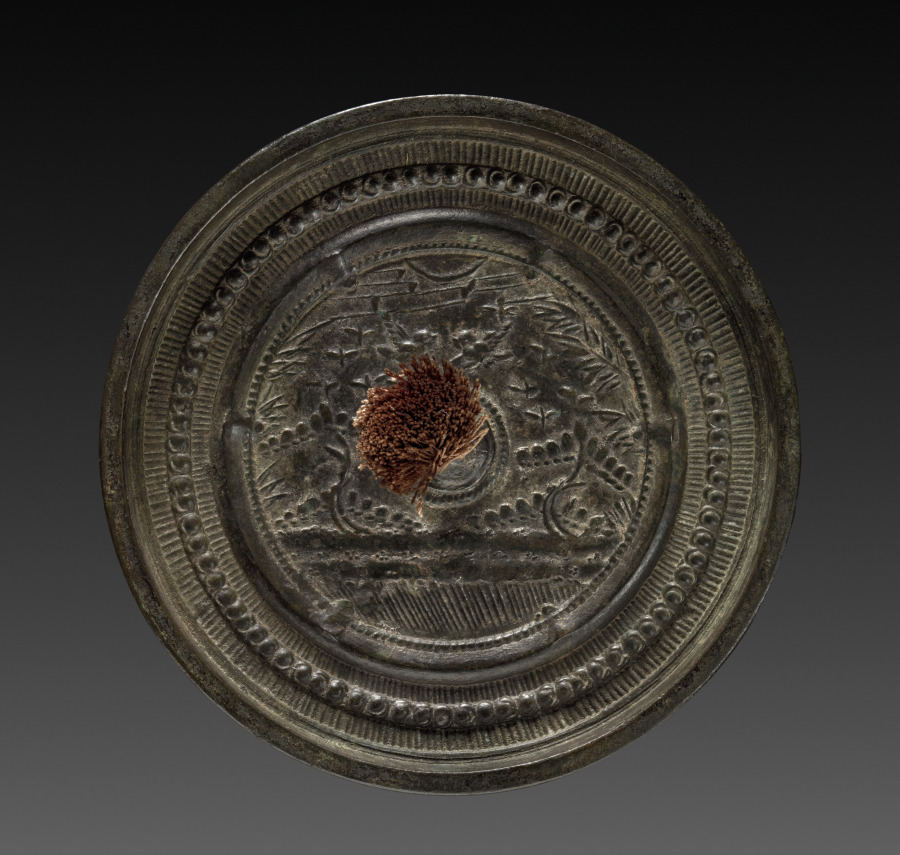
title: Mirror with Pair of Birds in Landscape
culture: Japan, Muromachi period (1392–1573)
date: 1392–1573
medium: bronze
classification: Metalwork